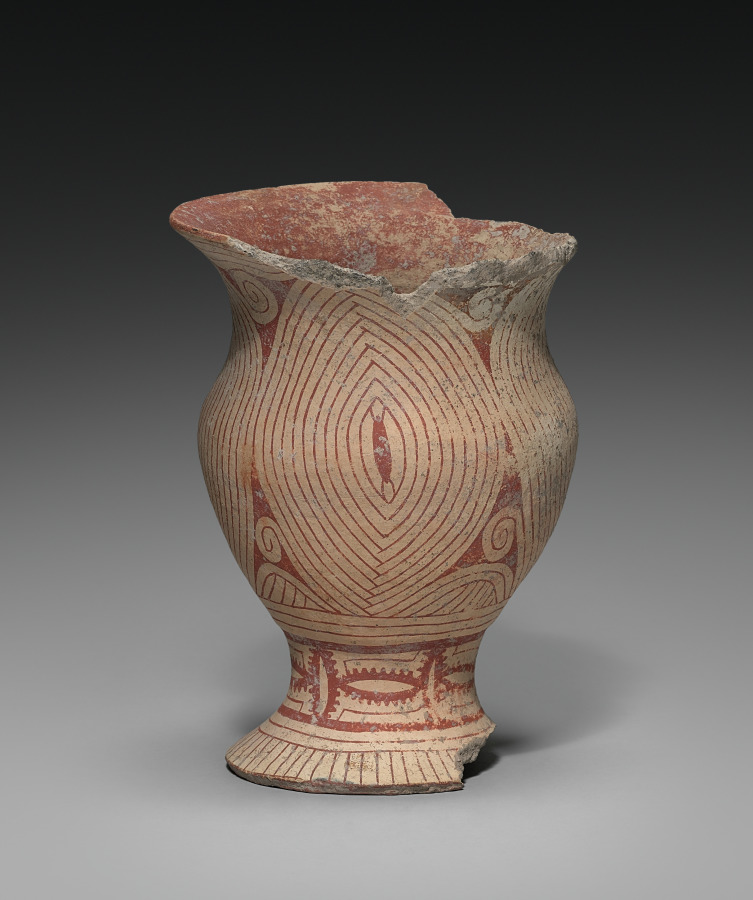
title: Jar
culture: Thailand, Ban Chiang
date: 300 BCE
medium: earthenware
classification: Ceramic